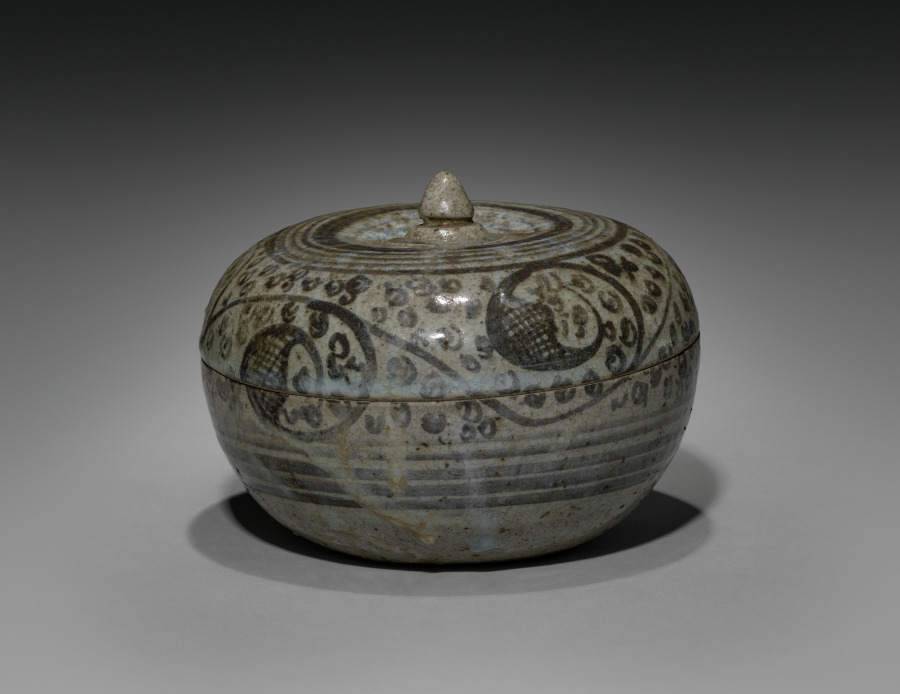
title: Covered Bowl with Painted Decoration with Lid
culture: Siam, Sawankhalok ware, 15th century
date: 1400s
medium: stoneware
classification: Ceramic